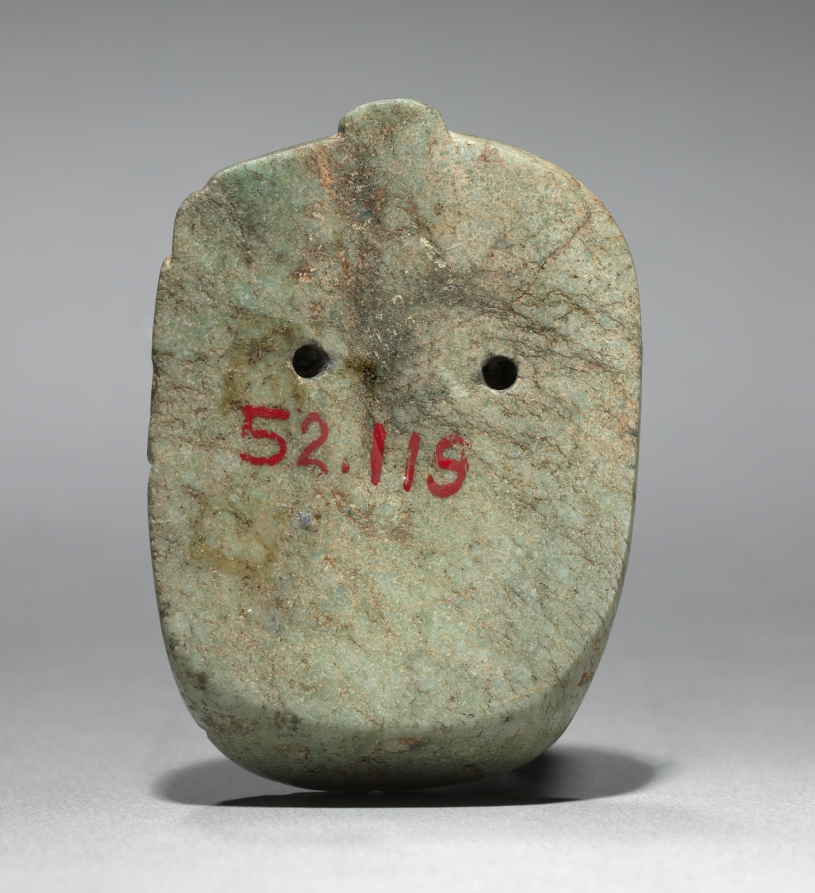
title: Ornament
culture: Mexico or Central America, Maya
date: 250–900 CE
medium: greenstone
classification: Jade